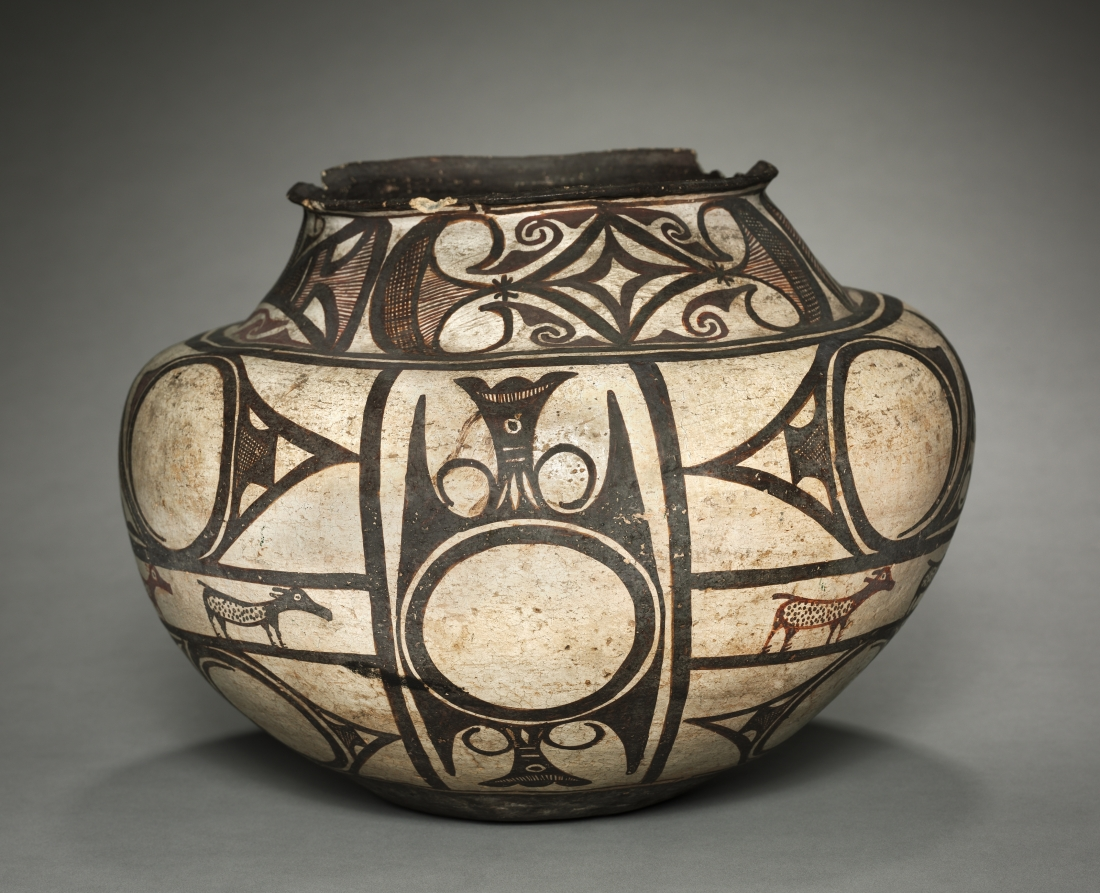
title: Water Jar (Olla)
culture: Southwest,Pueblo, Zuni, Post-Contact Period, late 19th century - early 20th century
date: 1880–1900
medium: ceramic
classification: Ceramic